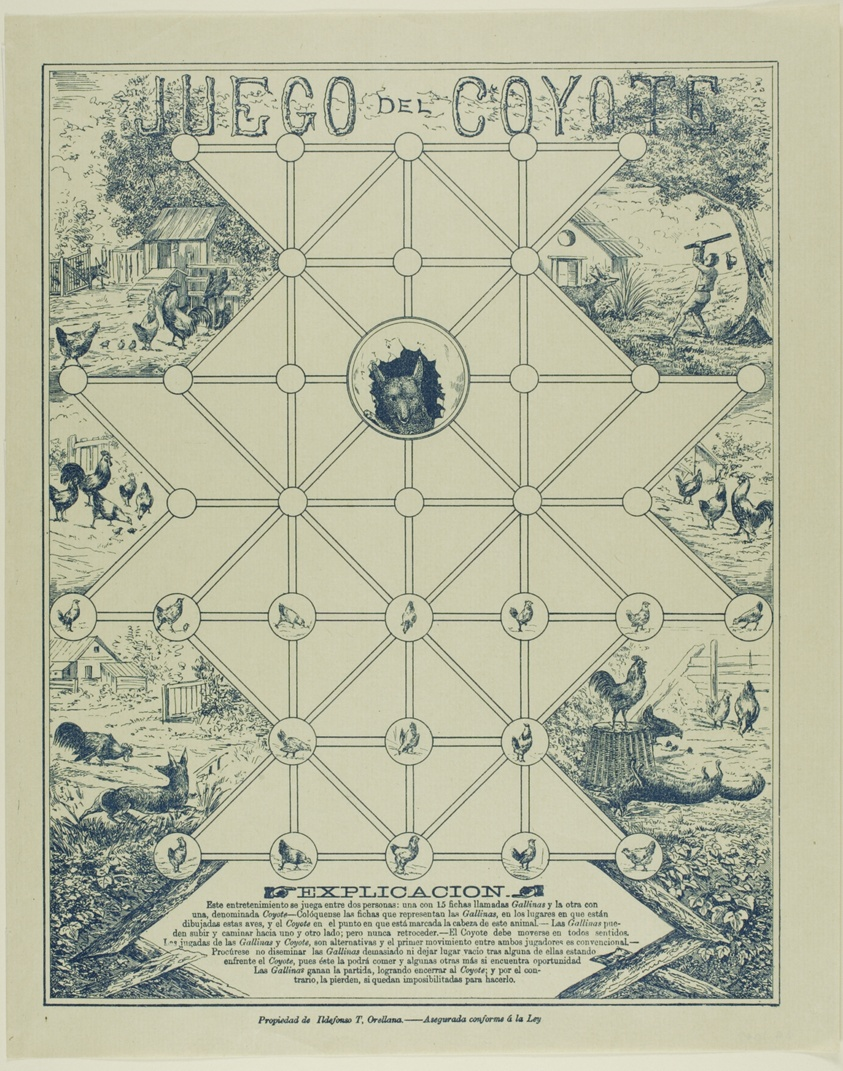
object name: Print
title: Game of the Coyote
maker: Follower of José Guadalupe Posada (Mexican, 1852-1913)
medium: Relief engraving on zinc on paper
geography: Mexico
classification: relief etching; print; prints and drawing